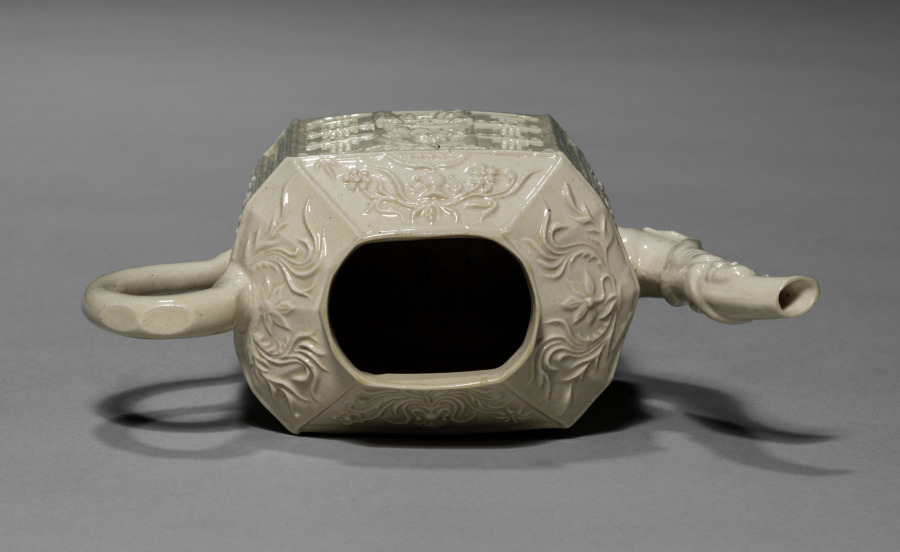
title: Teapot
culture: England, Staffordshire, 18th century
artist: Staffordshire Factory (British)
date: c. 1745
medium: salt-glaze earthenware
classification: Ceramic